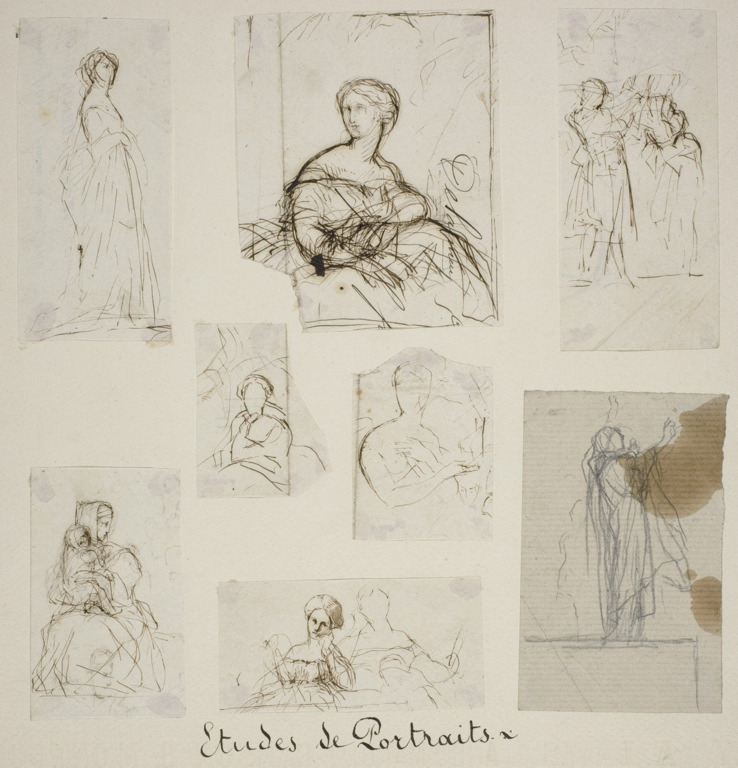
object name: Drawing and Watercolor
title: Group of Portrait and Compositional Studies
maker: Jules-Élie Delaunay (French, 1828-1891)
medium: Pen and ink and graphite on paper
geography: France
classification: pen and ink drawings; drawings (visual works); prints and drawing